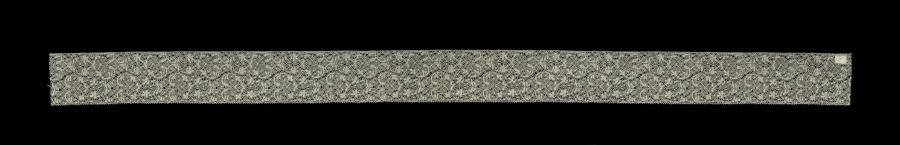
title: Lace Edging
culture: Belgium, Binche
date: 1900–1935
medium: Linen: bobbin lace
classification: Lace